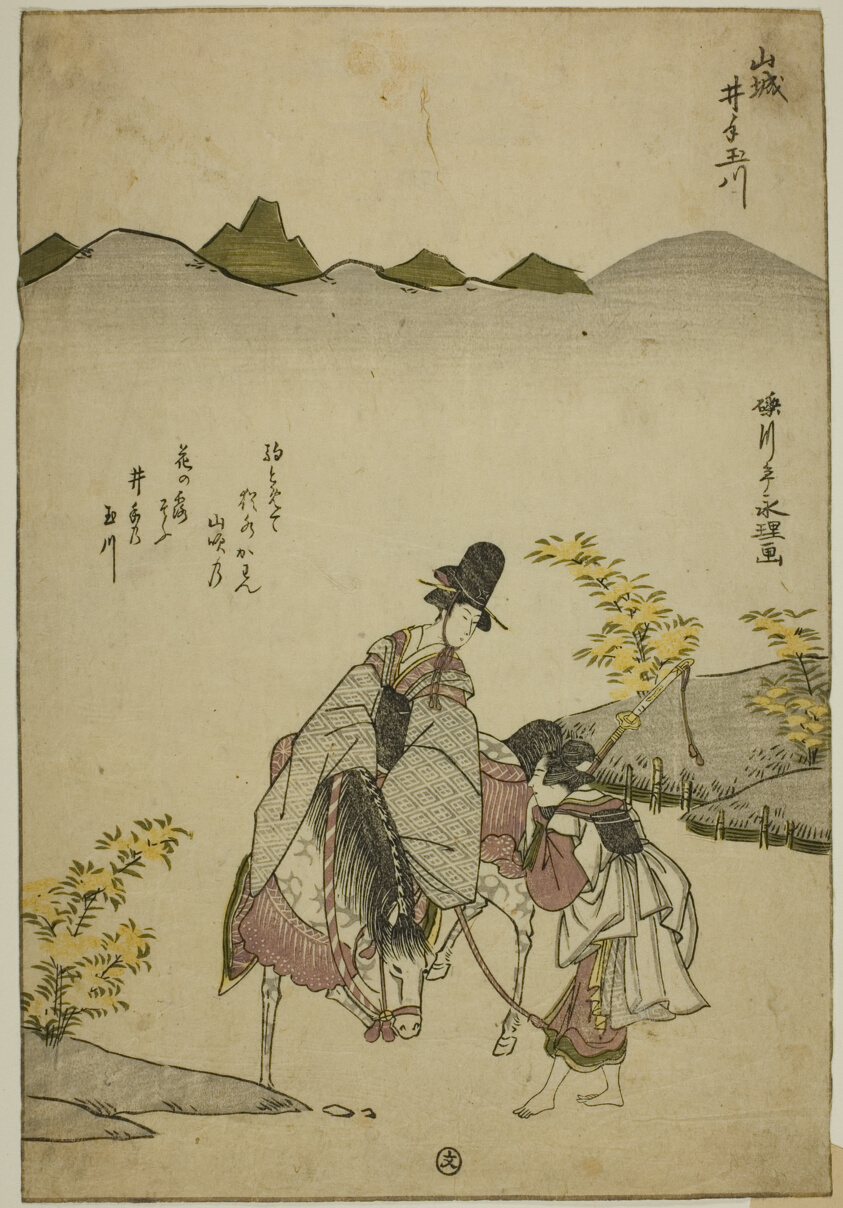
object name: Print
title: The Ide Jewel River in Yamashiro Province (Yamashiro Ide no Tamagawa), from an untitled series of Six Jewel Rivers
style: Japanese (culture or style)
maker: Rekisentei Eiri (Japanese, active c. 1781–1818)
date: c. 1785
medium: Color woodblock print; aiban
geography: Japan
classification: woodblock print; print; asian art